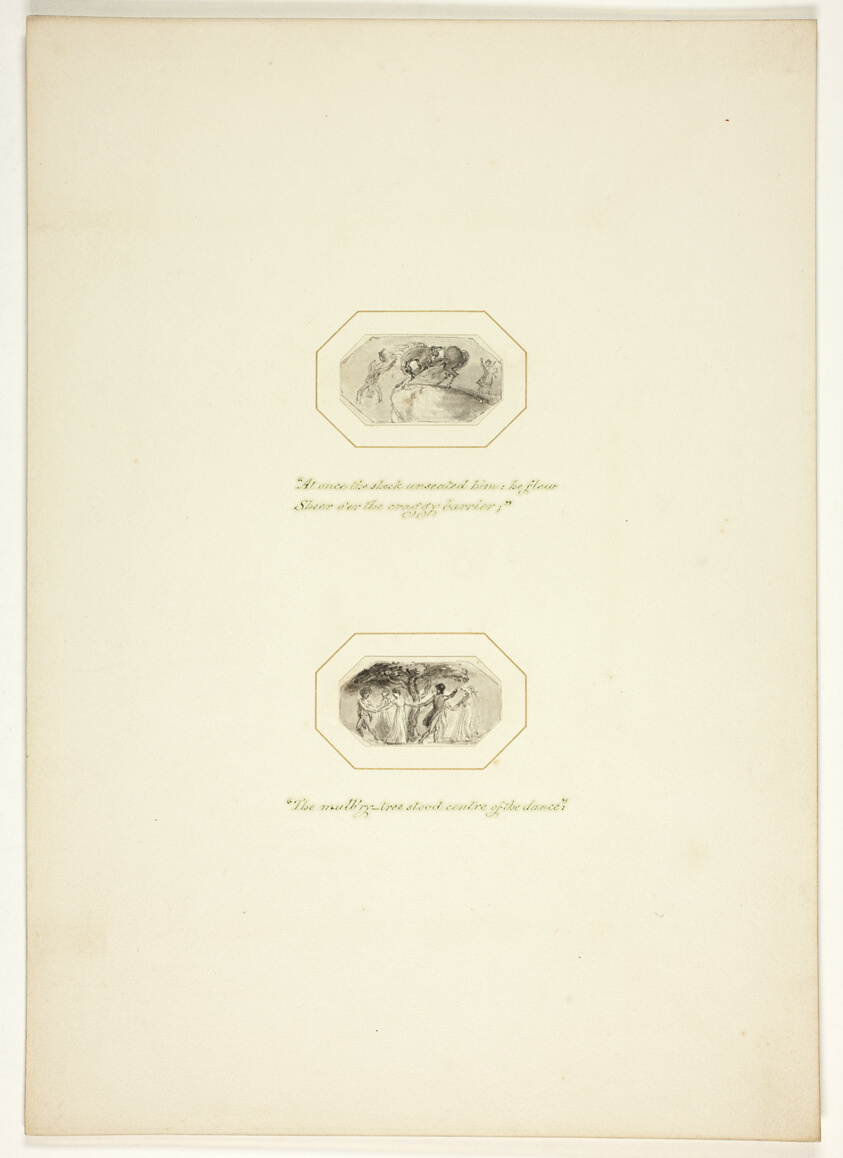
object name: Drawing and Watercolor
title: Study for a plate from The Task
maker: Thomas Stothard (English, 1755-1834)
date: c. 1800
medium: Ink wash on paper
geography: England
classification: ink or chalk wash; drawings (visual works); prints and drawing